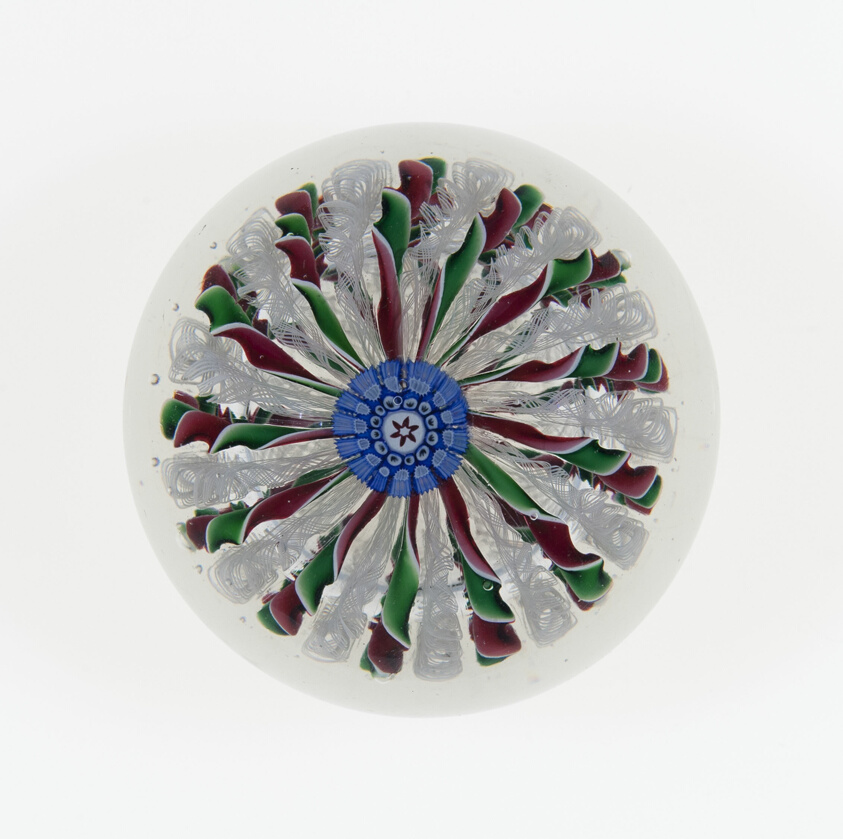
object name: Glass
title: Paperweight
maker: Saint-Louis Glassworks (Cristalleries de Saint-Louis); Lorraine, France, founded 1586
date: c. 1845–55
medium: Glass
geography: Saint-Louis-lès-Bitche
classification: paperweight; lampwork; european decorative arts; glass